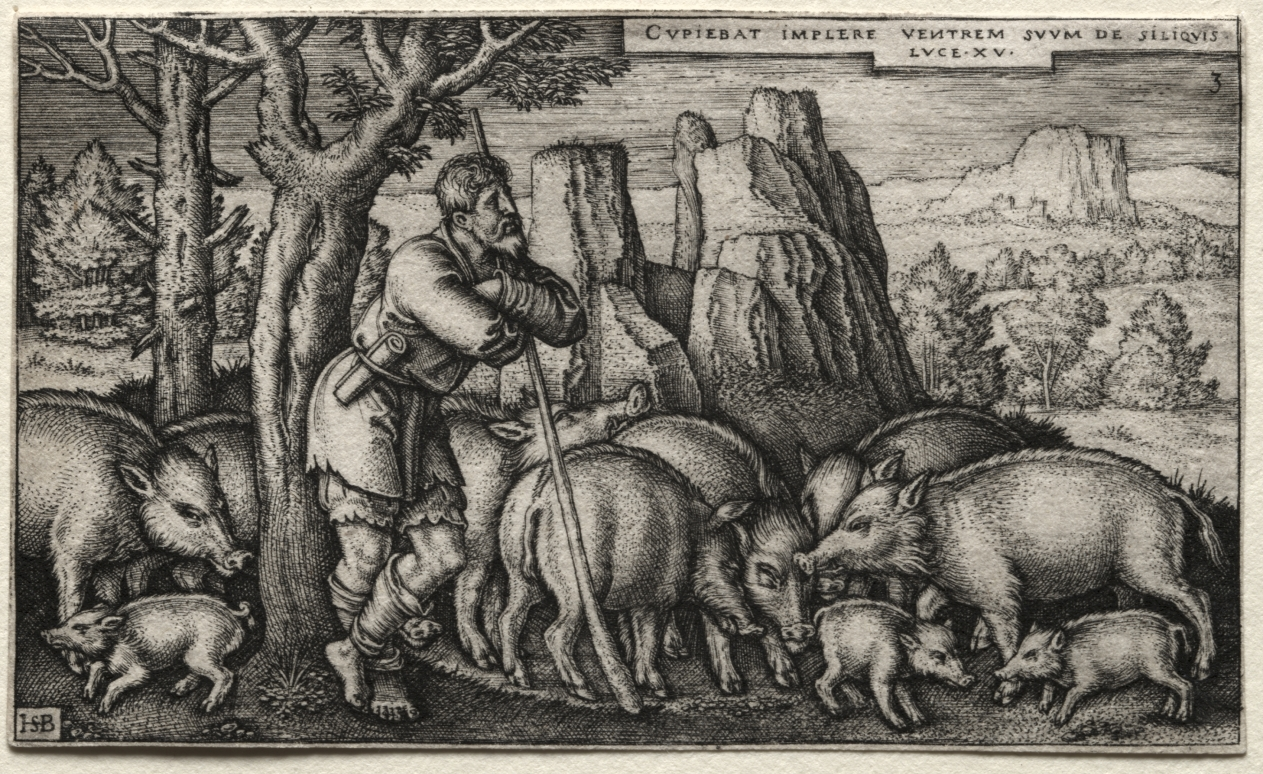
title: The Prodigal Son: Tending Swine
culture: Germany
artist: Hans Sebald Beham (German, 1500–1550)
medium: engraving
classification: Print